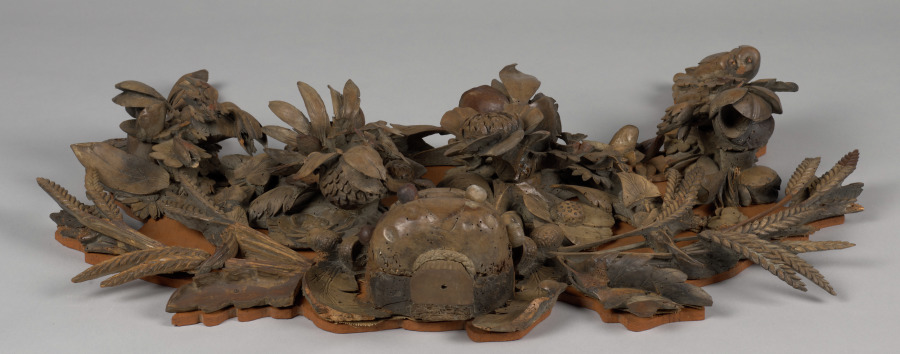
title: Overdoor Decoration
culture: England, 17th century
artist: Grinling Gibbons (British, 1648–1721)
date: c. 1675–1677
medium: limewood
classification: Sculpture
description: This wood carving by Grinling Gibbons, England’s most famous master of this medium, comes from the decoration above a door of the Inner Library at Cassiobury Park, near London, one of the artist’s earliest commissions. Decorative elements from this house were sold after it was pulled down in 1922, but many rooms were photographed before their destruction, and the original location of surviving carvings can thus be identified.